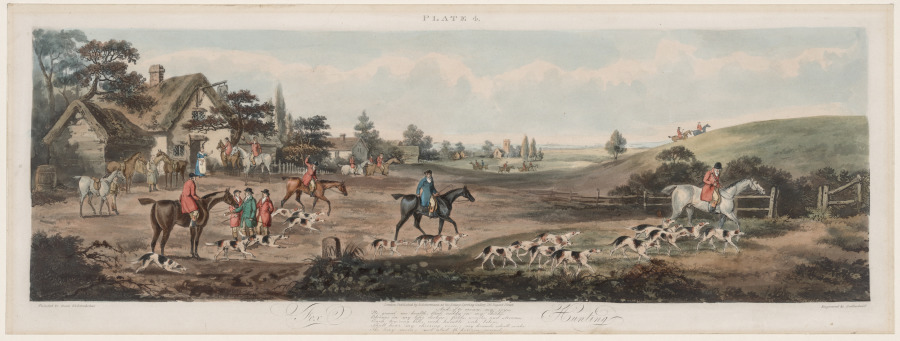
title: Fox Hunting, No. 4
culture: England, 19th century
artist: Thomas Sutherland (British, 1785–1838)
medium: aquatint and etching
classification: Print